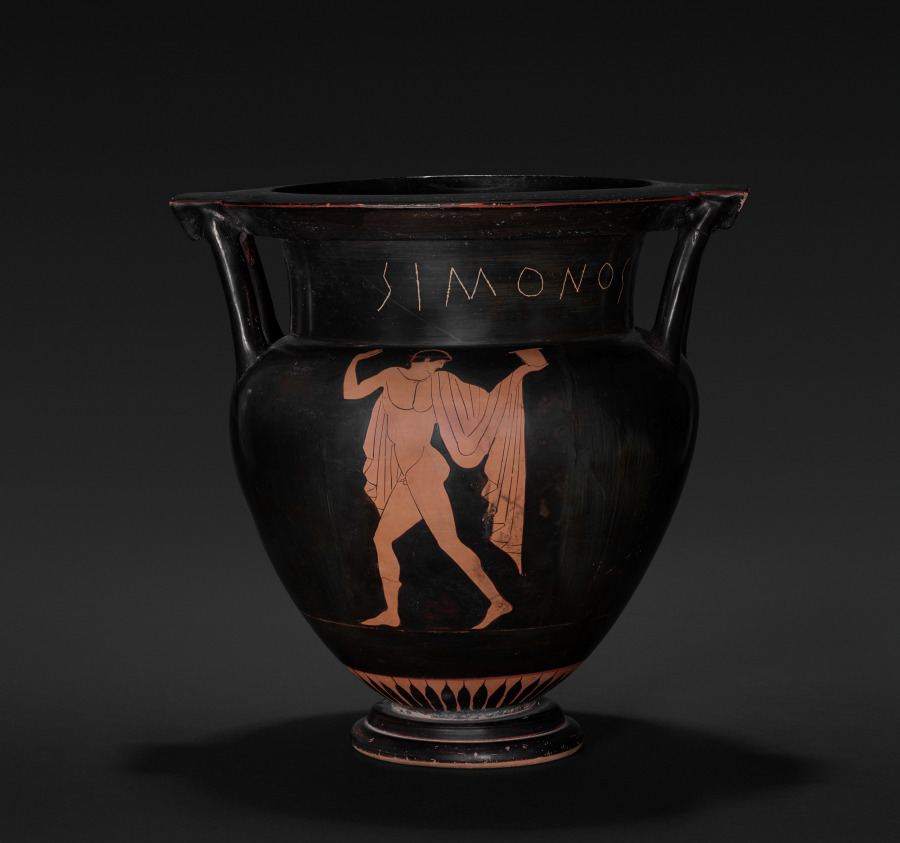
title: Red-Figure Column Krater (Mixing Vessel): Komos (Revel)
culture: Greek, Attic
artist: attributed to Pig Painter (Greek, Attic, active c. 480–460 BCE)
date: 470–460 BCE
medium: ceramic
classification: Ceramic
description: Used for mixing wine and water at a symposium (or drinking party), this column-krater speaks to the perils and pleasures of drinking. On one side, a bearded man holding a staff and a drinking cup leans forward, a red stream of vomit falling from his mouth. Before him is a nude young boy, holding a tortoiseshell lyre and a basket or pail. On the other side, a young man dances, holding a deep cup and wearing just one boot. On the neck above him, scratched in large letters, is the name SIMONOS, probably indicating that the vase once belonged to someone named Simon.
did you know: The bearded man on this vase is vomiting—perhaps a humorous warning against over imbibing.